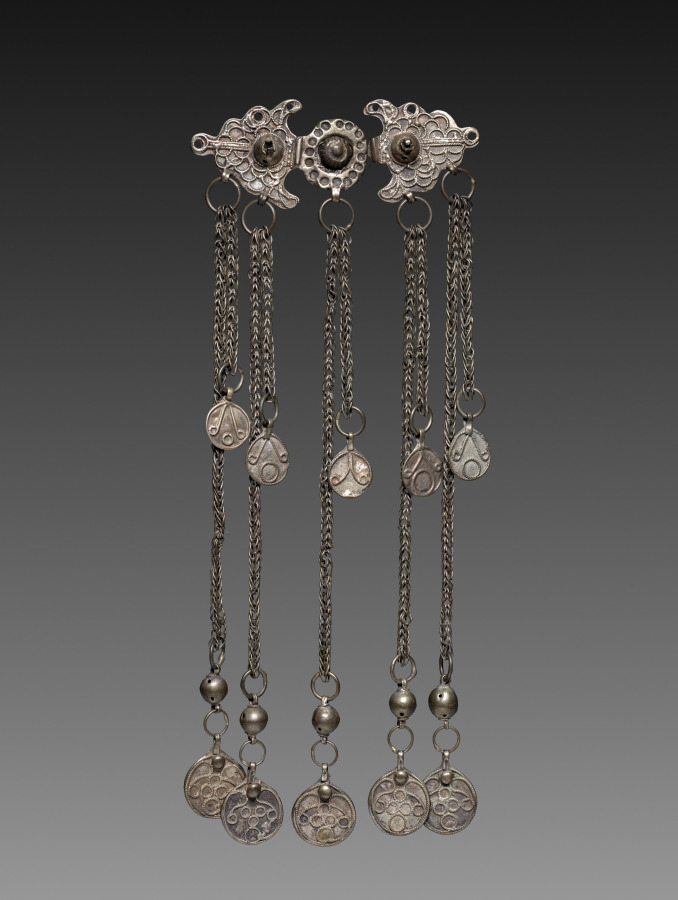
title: Clasp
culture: Palestine, Ramallah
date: early 1900s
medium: silver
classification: Jewelry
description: This is a Palestinian neck ornament called a qifl meaning "lock." It was worn attached to the headdress like a chin chain.